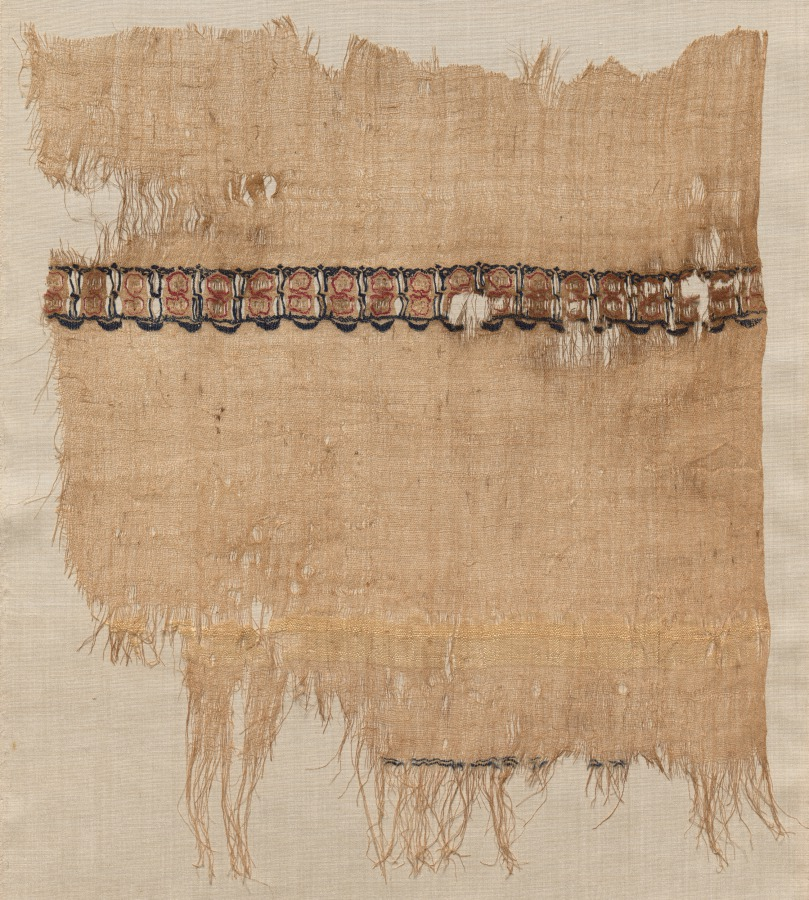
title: Fragment of a Tiraz-Style Textile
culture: Egypt, Fatimid period, Caliphate of al-Musta'li or al-Amir, AH 487-524, 11th-12th Century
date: 1094 – 1130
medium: tabby ground with inwoven tapestry ornament; linen and silk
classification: Textile